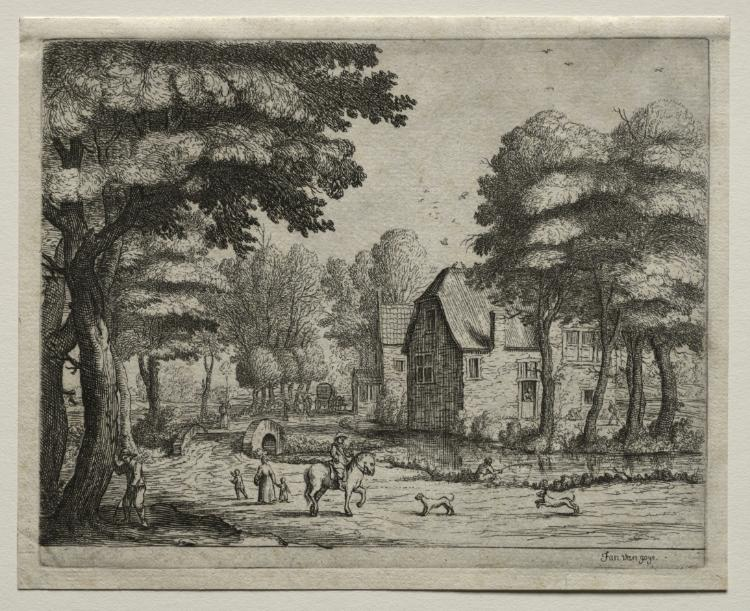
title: The Stone Bridge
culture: Netherlands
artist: Jan van Goyen (Dutch, 1596–1656)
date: c. 1650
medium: etching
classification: Print